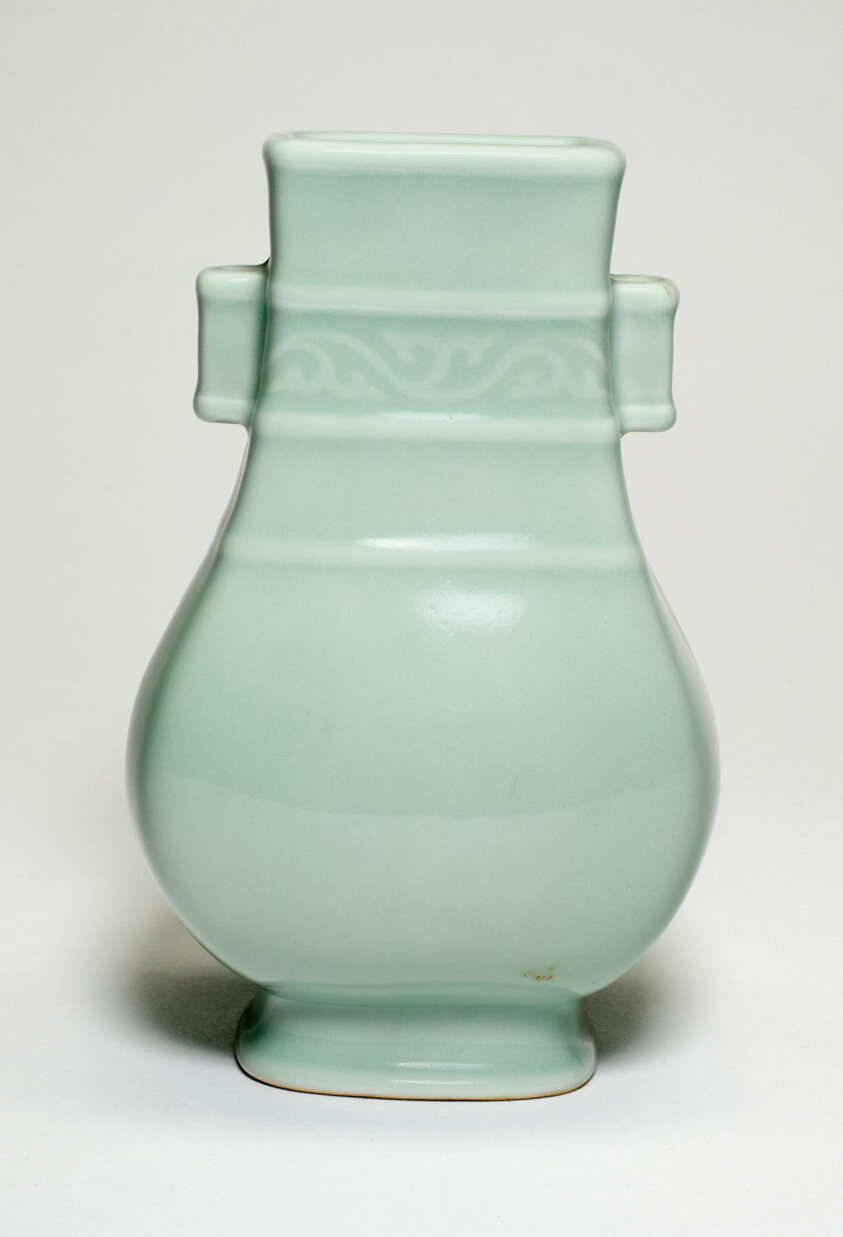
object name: Vessel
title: Vase in the Shape of an Ancient Bronze Vessel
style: Chinese (culture or style)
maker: China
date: Qing dynasty (1644–1911), Qianlong reign mark (1736–1795), 18th/19th century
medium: Celadon-glazed porcelain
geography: China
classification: vase; porcelain; vessel; asian art; ceramics